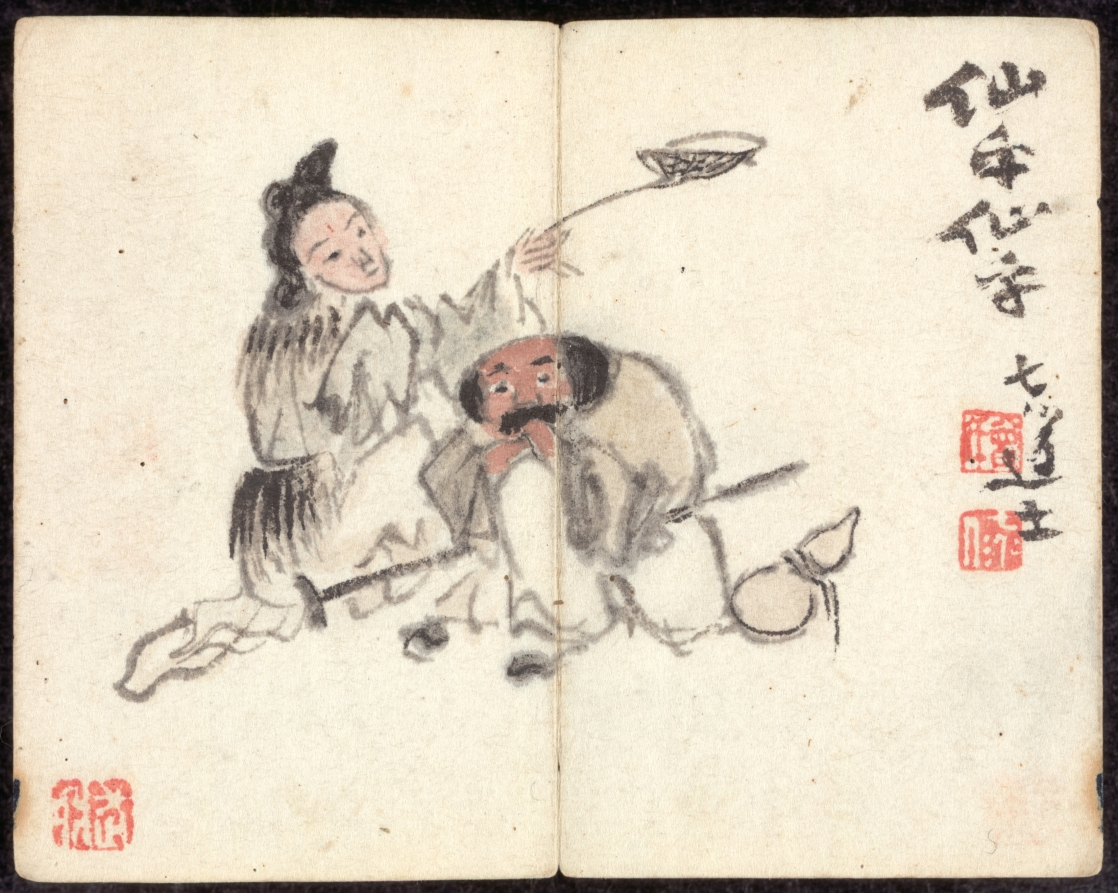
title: Miniature Album with Figures and Landscape (Man and Woman)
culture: China, Qing dynasty (1644–1911), Qianlong reign (1736–95)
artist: Zeng Yandong (Chinese, c. 1751–1827)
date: 1822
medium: album leaf, ink and color on paper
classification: Painting